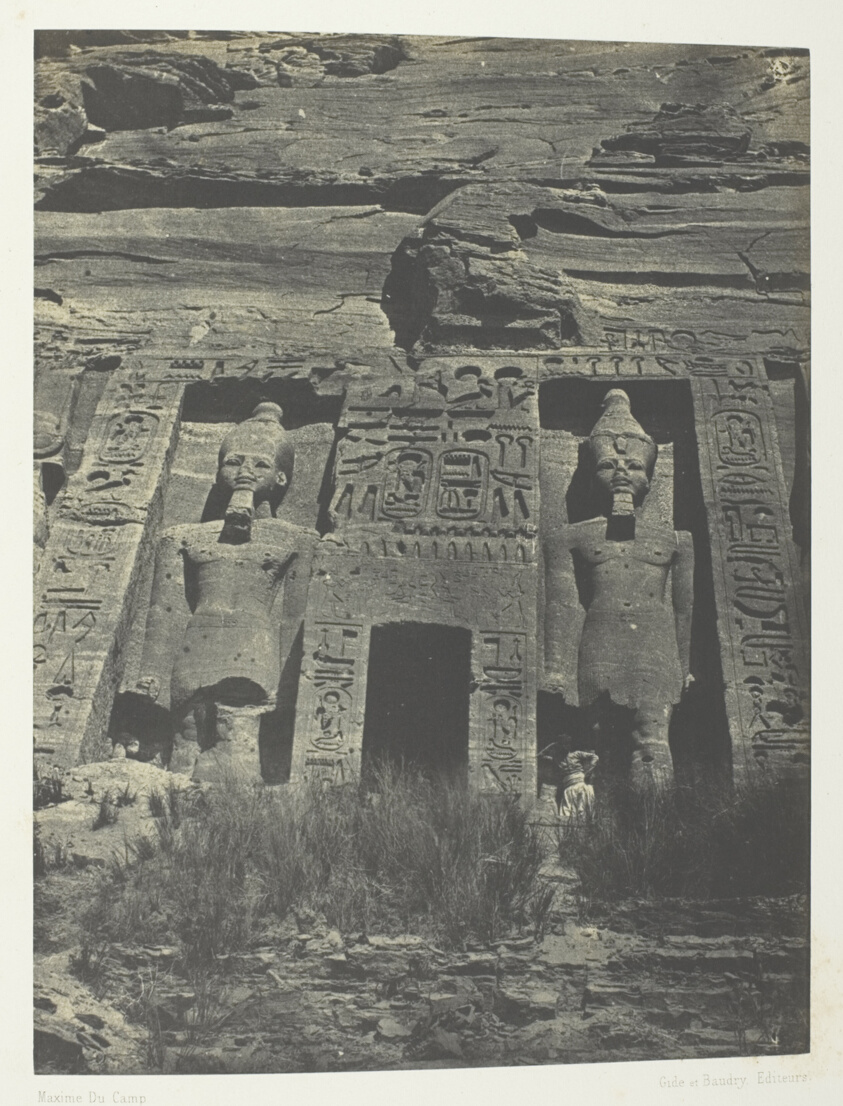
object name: Photograph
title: Ibsamboul, Entrée De Spéos D'Hathor; Nubie, plate 109 from the album "Egypte, Nubie, Palestine et Syrie" (1852)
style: 19th century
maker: Maxime Du Camp (French, 1822–1894)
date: 1849/51, printed 1852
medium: Salted paper print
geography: France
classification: salted paper print; photographic process; photography; photograph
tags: Collected by Hugh Edwards, Egypte, Nubie, Palestine et Syrie